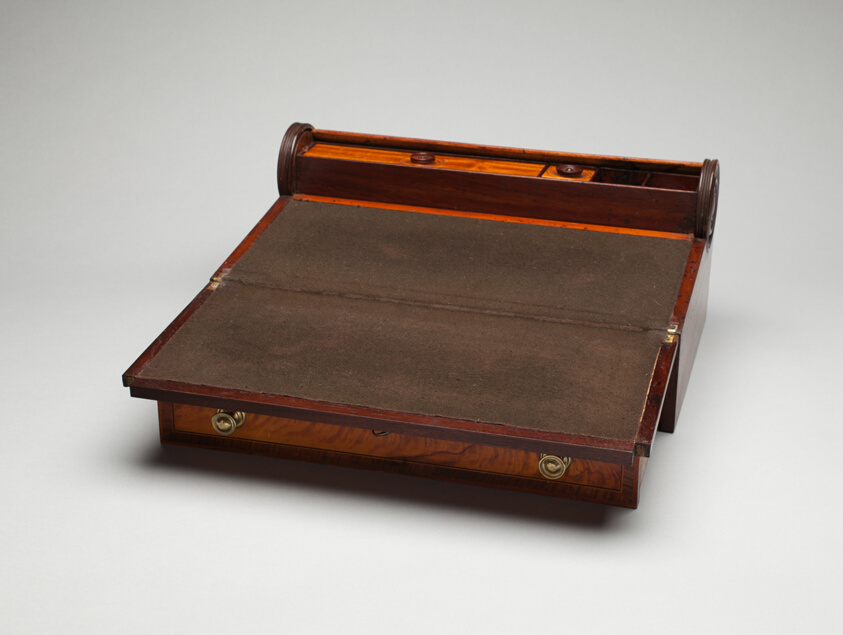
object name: Furniture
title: Traveling Desk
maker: Artist unknown (American, 19th century); Boston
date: 1800–15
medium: Mahogany, satinwood, and brass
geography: Boston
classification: desk; furniture; american decorative arts; american arts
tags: furniture